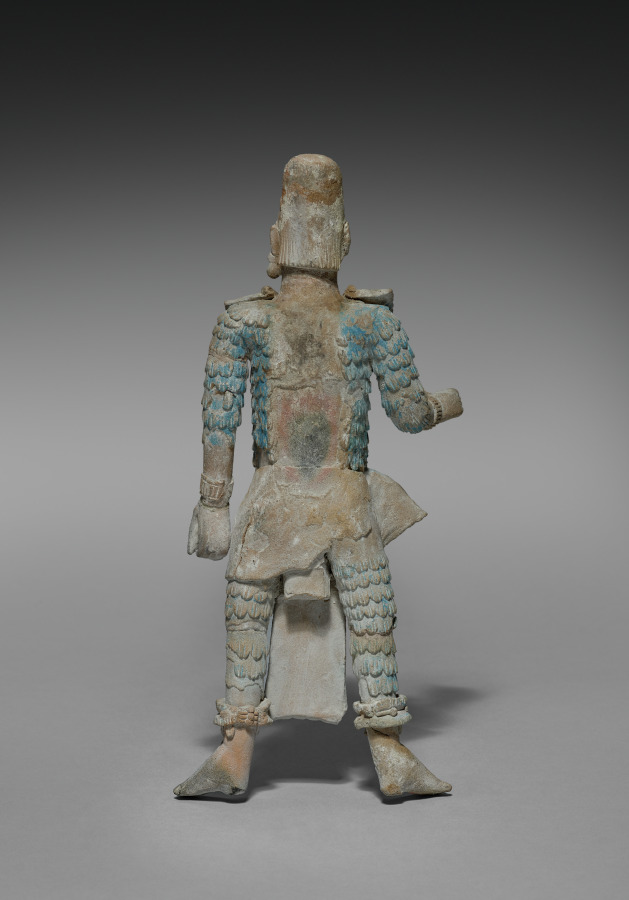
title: Warrior Figurine with Removable Headdress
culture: Mexico, Yucatán, Jaina Island region, Campeche, Maya style (250-900)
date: 600–900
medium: earthenware with pigment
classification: Sculpture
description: The major offerings placed in the Maya graves of Jaina Island were ceramic figurines, some of Mesoamerica's finest, that depict deities and humans in a variety of roles. This warrior, his headdress removable, once probably held weapons and wears either quilted cotton armor or the feathered uniform of a military order. We don't know why such figures are often pot-bellied.